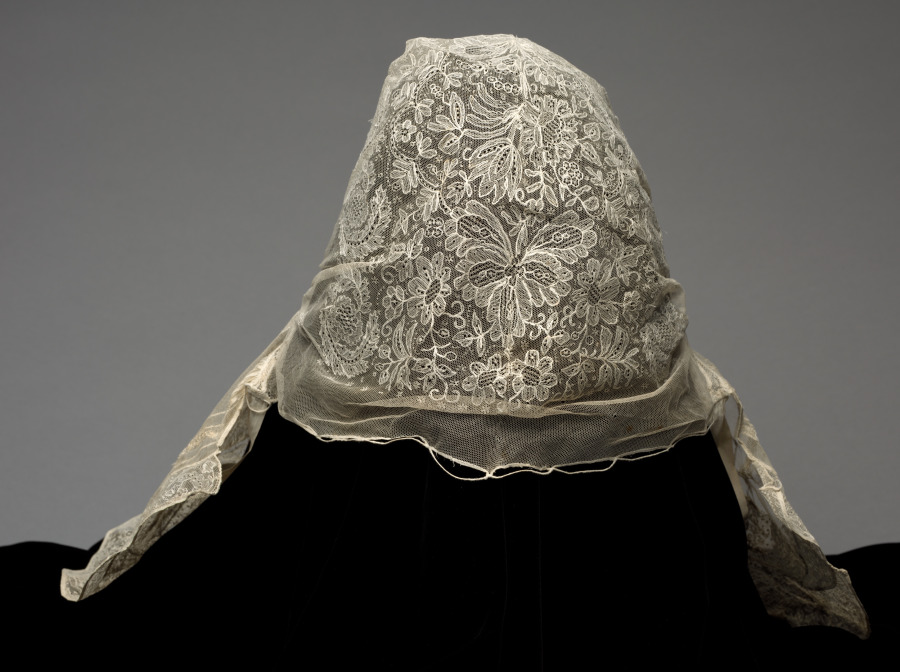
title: Lace Cap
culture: Netherlands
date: 1700s–early 1800s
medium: Lace net with embroidery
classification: Garment